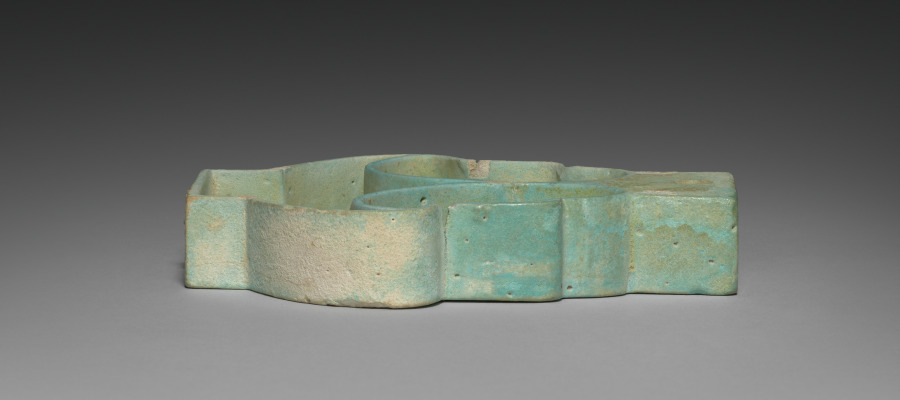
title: Box (Pyxis) in the Form of a Composite Capital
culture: Egypt, Greco-Roman period (332 BCE–395 CE), Ptolemaic dynasty (305–30 BCE)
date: 305–30 BCE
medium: pale robin's-egg blue faience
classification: Vessels